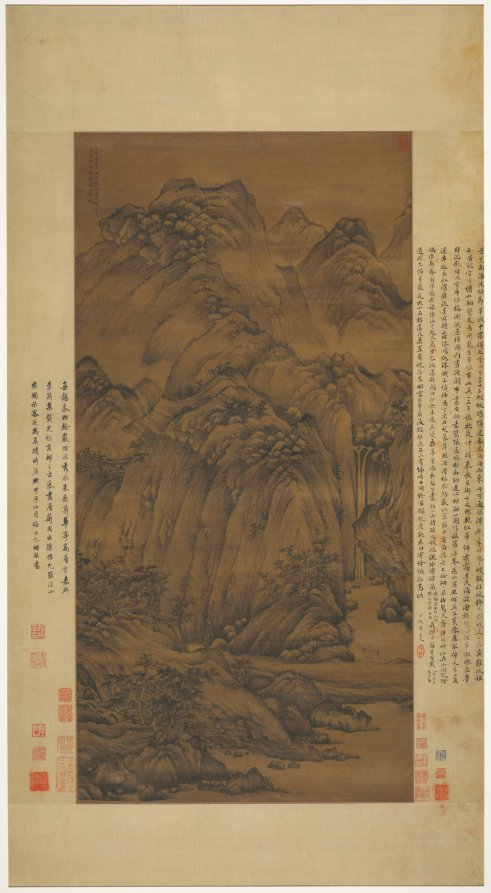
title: The Woodcutter of Luofu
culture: China, Yuan dynasty (1271-1368)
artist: Chen Ruyan (Chinese, c. 1331–1371)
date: 1366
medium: Hanging scroll; ink on silk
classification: Painting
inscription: 至正二十六年（1366）正月望後廬山汝言為思齊斷事寫羅浮山樵圖。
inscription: 2 colophons and 18 additional seals: 5 seals of Wang Shimin 王時敏 (1592–1680); 2 seals of Gong Xianglin 龔翔麟 (1658–1733); 1 colophon, dated 1684, of Yan Shengsun 嚴繩孫 (1623–1702); 1 colophon and 1 seal of Huang Ren (1683–1768); 2 seals of Lu Shusheng 陸樹聲 (3rd son of Lu Xinyuan 陸心源); 2 seals of T'ao Kuang; 1 seal of Tan Jing 譚敬 (20th c.); 3 seals of Zhang Heng 張珩 (1915–1963); 2 seals unidentified.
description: This landscape illustrates the traditionalism of Chinese painting: while the brush manner is novel, the composition is based on early Song dynasty (960-1127) models. The soft raveling brushstrokes and lumpy rock shapes are characteristic of the new 14th-century stylistic expression.